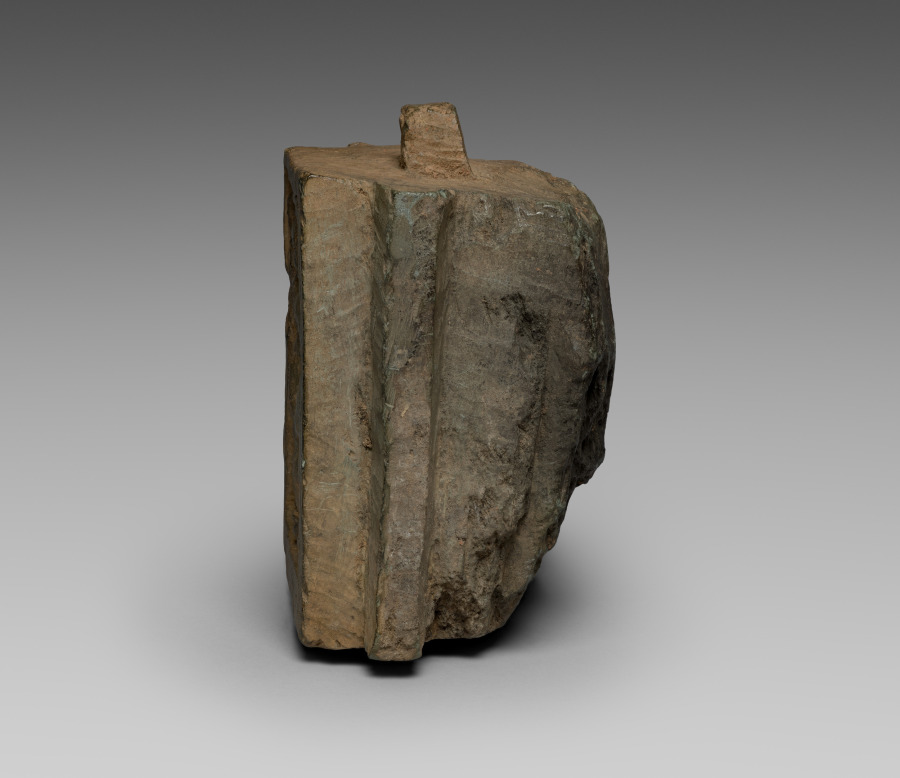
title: Architectural Bracket with Wrestlers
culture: Pakistan, Gandhara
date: 100s–200s CE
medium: schist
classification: Sculpture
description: This sculpture probably derived from Greco-Roman prototypes of nude athletes, but here it has probably been transposed into a scene from the boyhood of the Buddha, when it is said that he excelled in all forms of athletics.